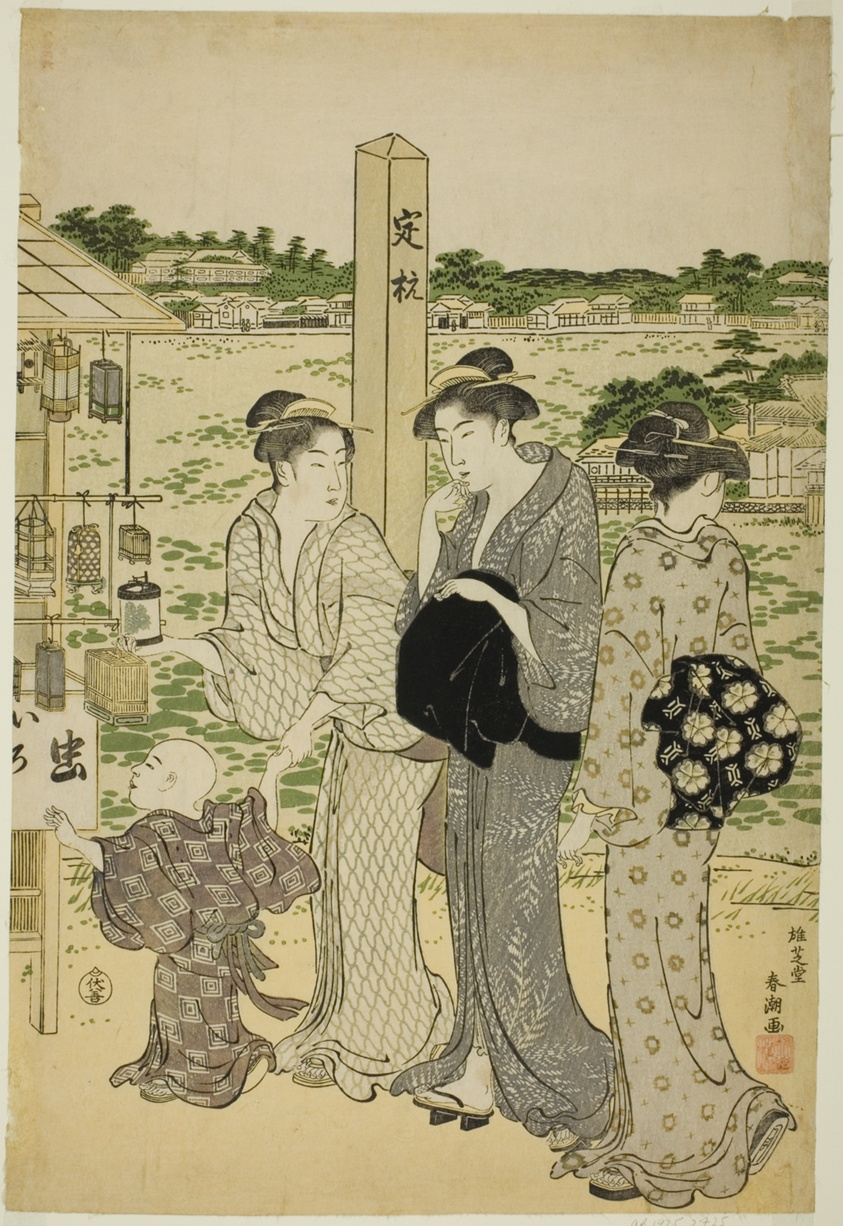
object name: Print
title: Benten Shrine in Shinobazu Pond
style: Japanese (culture or style)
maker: Katsukawa Shuncho; Japanese, active c. 1780-1801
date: late 1780s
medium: Color woodblock print; center sheet? of oban triptych (right: 1925.2724)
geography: Japan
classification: woodblock print; print; asian art